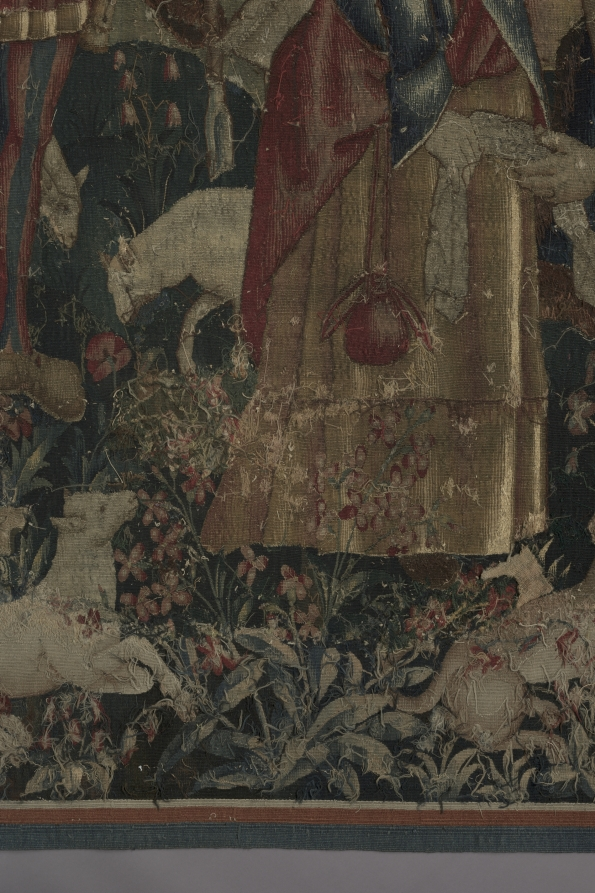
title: Shepherds in a Round Dance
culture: Netherlands, early 16th century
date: around 1500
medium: Wool and silk: tapestry weave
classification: Tapestry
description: Late medieval tapestries often use a limited yet contrasting color palette to portray stylized images. The expressions of these figures, for example, are conveyed more by their postures than by their faces. Four shepherds and shepherdesses join hands and dance to the music of a bagpiper at the far right, while a lord and two ladies on the left look on. A dog and sheep amid blossoming plants and trees contribute to the festive pastoral scene in front of a castle.